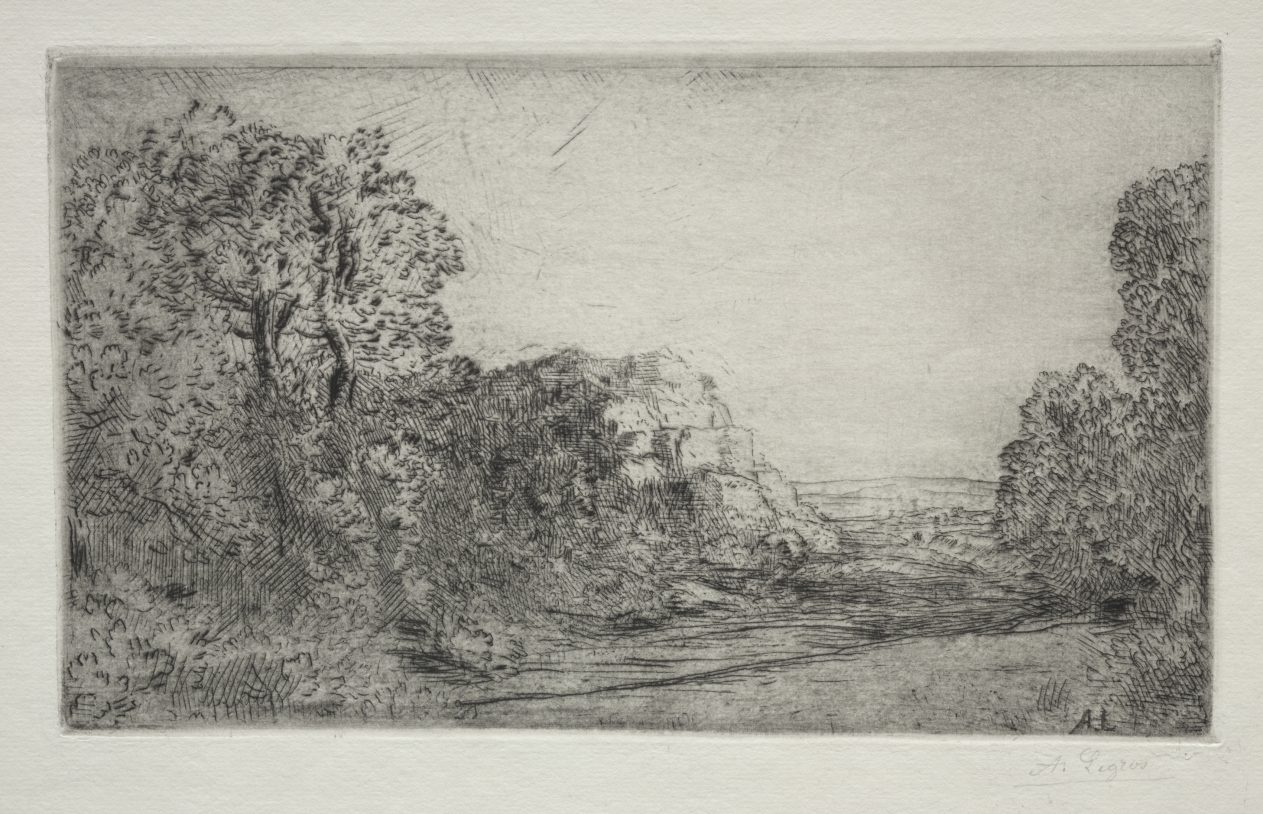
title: Landscape: Sunrise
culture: France, 19th century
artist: Alphonse Legros (French, 1837–1911)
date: c. 1857–1911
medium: drypoint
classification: Print